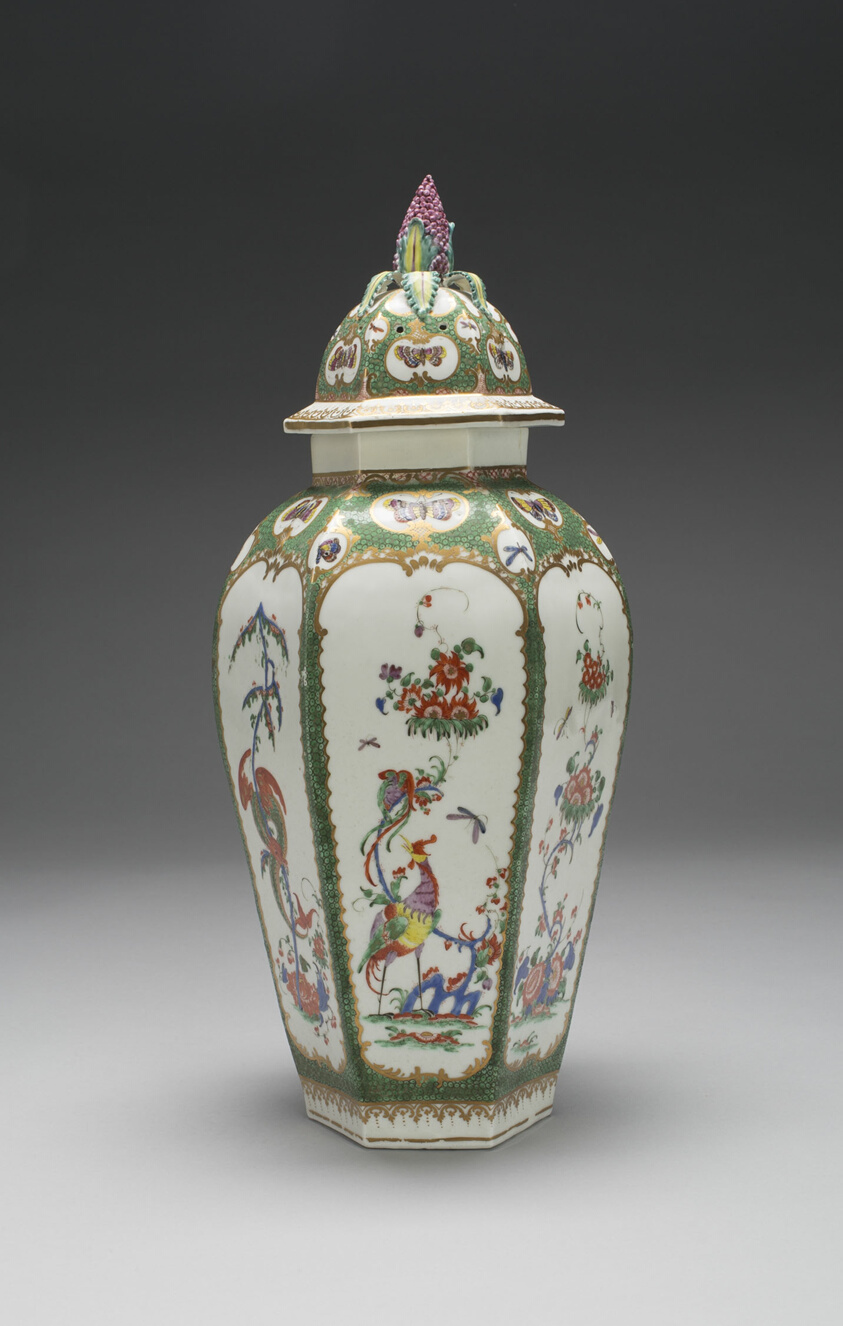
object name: Ceramics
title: Vase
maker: Bristol Porcelain Factories (England, 1770-1781/82)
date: c. 1760/65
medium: Hard-paste porcelain and polychrome enamels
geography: Bristol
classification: vase; vessel; porcelain; ceramics; european decorative arts